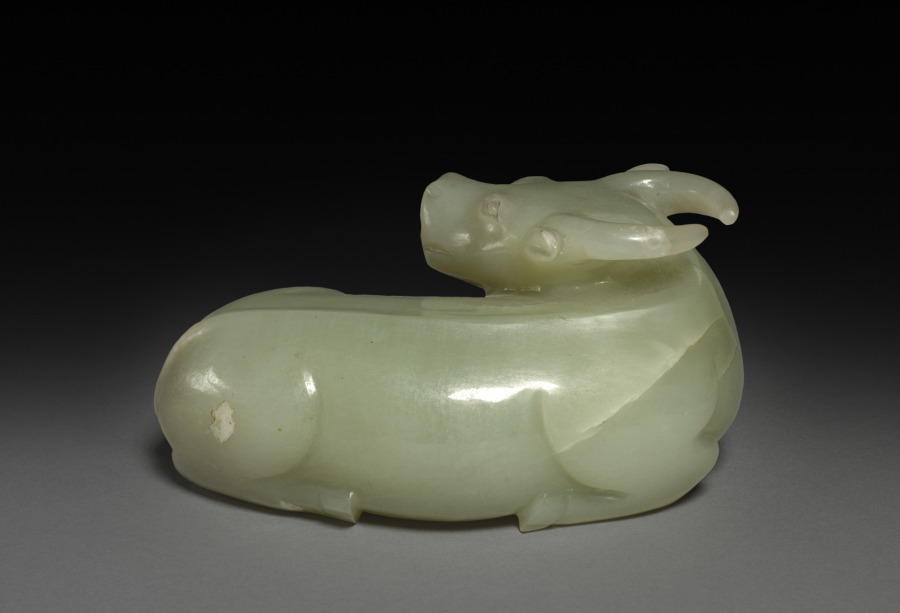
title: Reclining Water Buffalo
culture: China, Qing Dynasty (1644-1911), Kangxi reign (1642-1722)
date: 1642–1722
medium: Jade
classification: Jade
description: In the Ming (1368–1644) and Qing (1644–1911) dynasties, luxury items became more affordable to larger parts of the society, including women, merchants, and literati in non-official positions. Imperial patronage and a growing urban population encouraged consumption of luxury goods and local craftmanship. This jade buffalo illustrates the superb carving skills and the creative mind of its accomplished creator, who sought clients on a competitive market.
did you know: This jade buffalo may have been used as a paperweight on a scholar's desk.